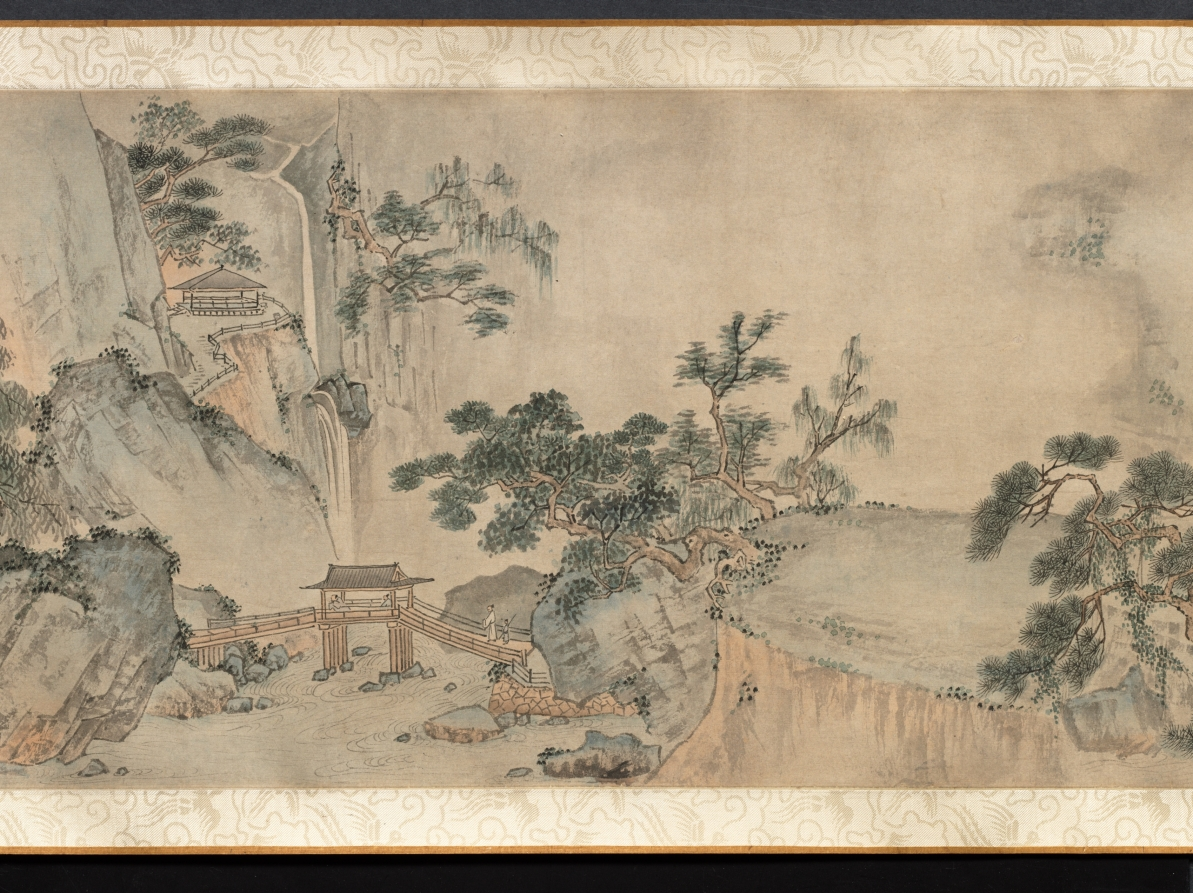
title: Ten Thousand Li of the Yangzi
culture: China, Ming dynasty (1368–1644)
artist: Dai Jin (Chinese, 1388–1462)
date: c. 1400s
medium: Handscroll; ink and color on paper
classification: Painting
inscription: Two colophons at end. Artist's seals: Dai Jin 戴進 and Wenjin 文進.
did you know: Dai Jin is traditionally considered the founder of the Zhe School, a style of landscape painting.